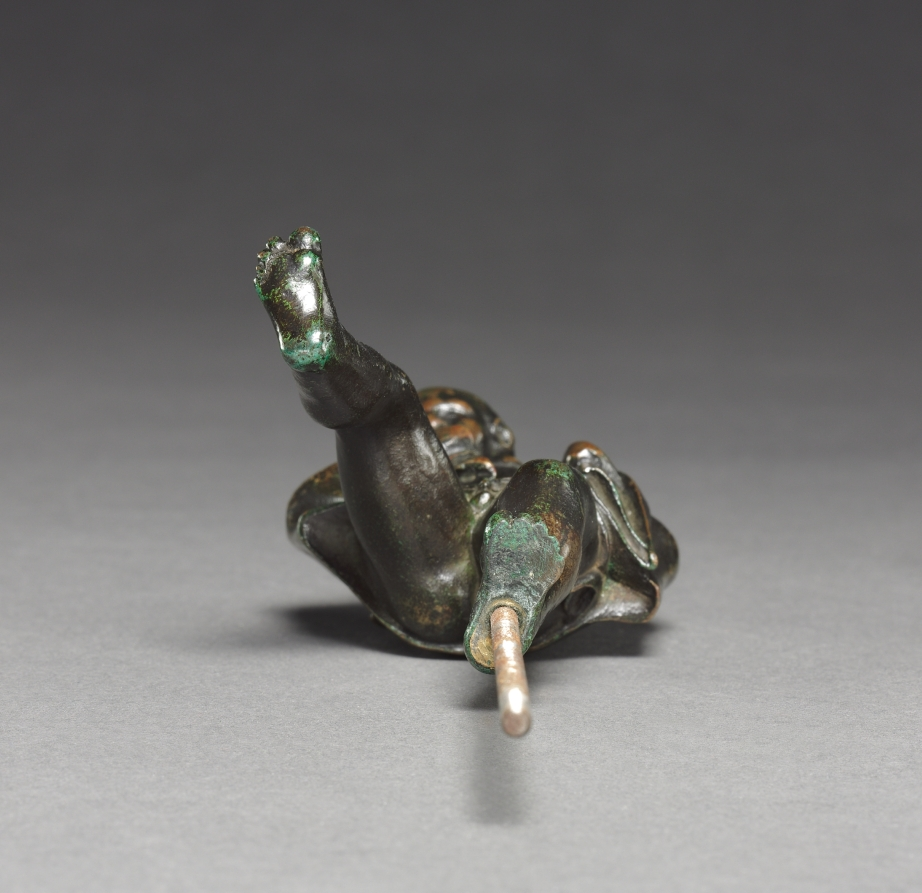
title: Dancing Boy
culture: Northern Italy, early 16th century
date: c. 1500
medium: bronze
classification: Sculpture